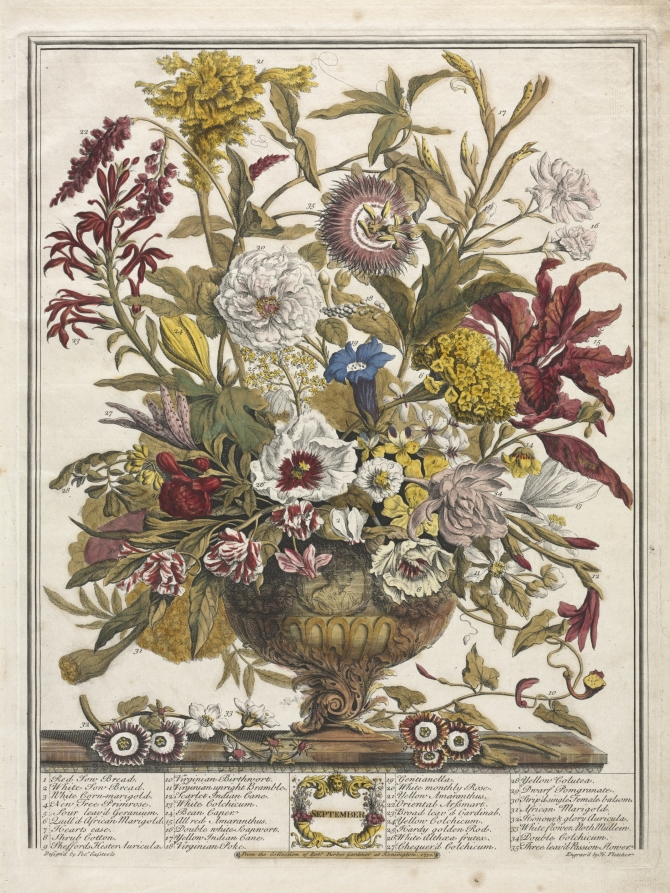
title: Twelve Months of Flowers: September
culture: England, 18th century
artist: Henry Fletcher (British, active 1715–38)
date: 1730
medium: engraving, hand-colored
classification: Print